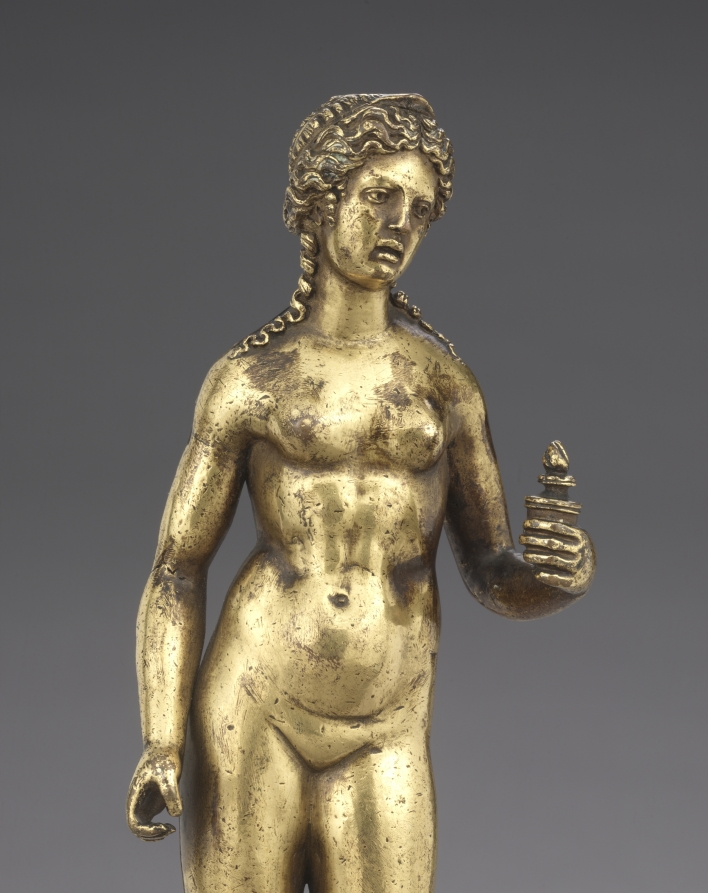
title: Venus with a Burning Urn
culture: Northern Italy, 16th century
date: c. 1500–1520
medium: gilt bronze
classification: Sculpture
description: Venus is the Roman goddess of many virtues, including Love, Charity, Fertility, and Victory. Here, Venus is represented as the goddess of Charity. She wears a crown, as Charity is often depicted as the Queen of the Virtues. The flaming lamp in Venus's left hand was also a symbol of Charity in Venice, where this piece is thought to have originated. The bent fingers of her right hand are bent suggest that Venus may have once held another object. Renaissance sculptors often looked back to antiquity when producing monumental and small bronze statues. The small bronze cabinet piece comes into Italian art during this time, bringing ancient gods and goddesses into Italian households. Venus stands in a contrapposto pose and, like Hellenistic and Roman objects, her locks are tied by a double ribbon while two curls fall on her shoulders. Her tilted head and large emotional eyes, as well as her small nose and parted lips reflect the influence of Hellenistic Greek facial styles.